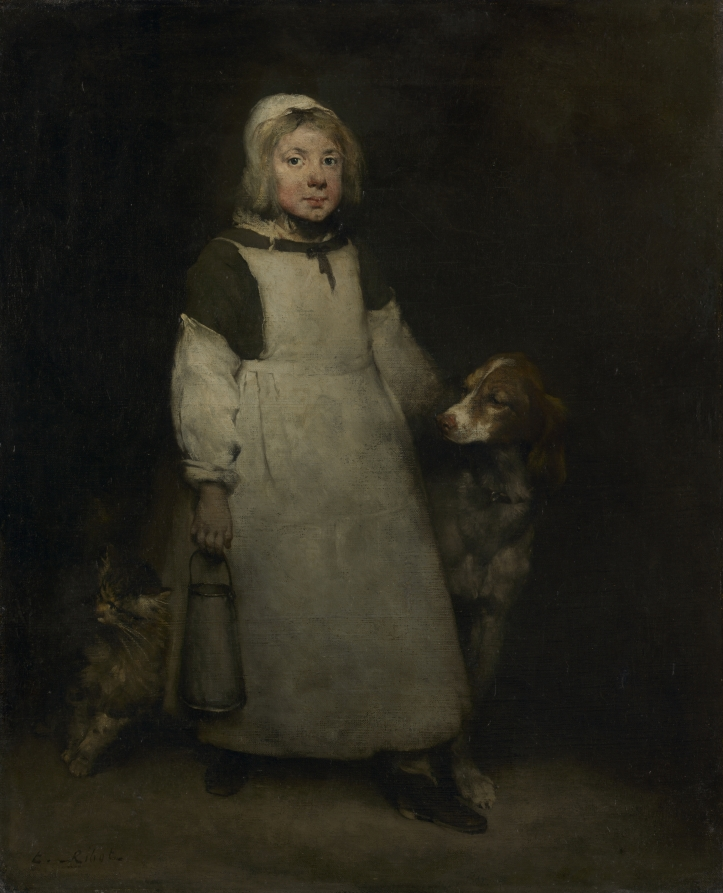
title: The Little Milkmaid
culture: France, 19th century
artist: Théodule Ribot (French, 1823–1891)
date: c. 1865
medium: oil on fabric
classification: Painting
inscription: Signed lower left: t. Ribot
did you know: Members of Ribot's family are the likely models for many of his figure compositions, in which the subjects engage in humble activities, such as preparing meals or gathering in groups to read to each other.